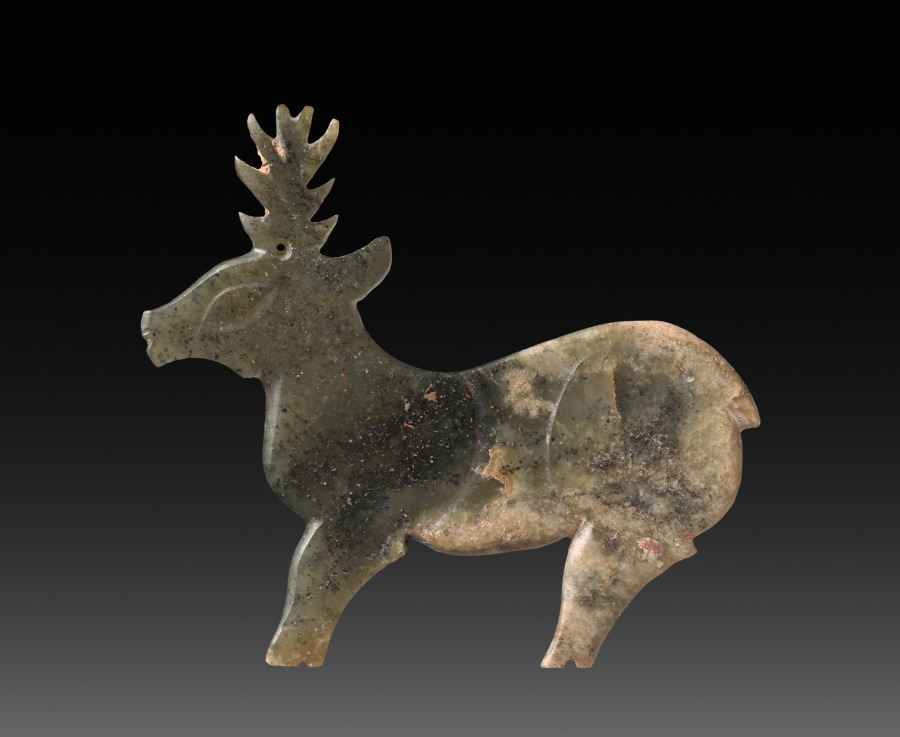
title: Stag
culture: China, Western Zhou dynasty (c. 1046–771 BCE)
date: 1100–900 BCE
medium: jade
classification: Jade